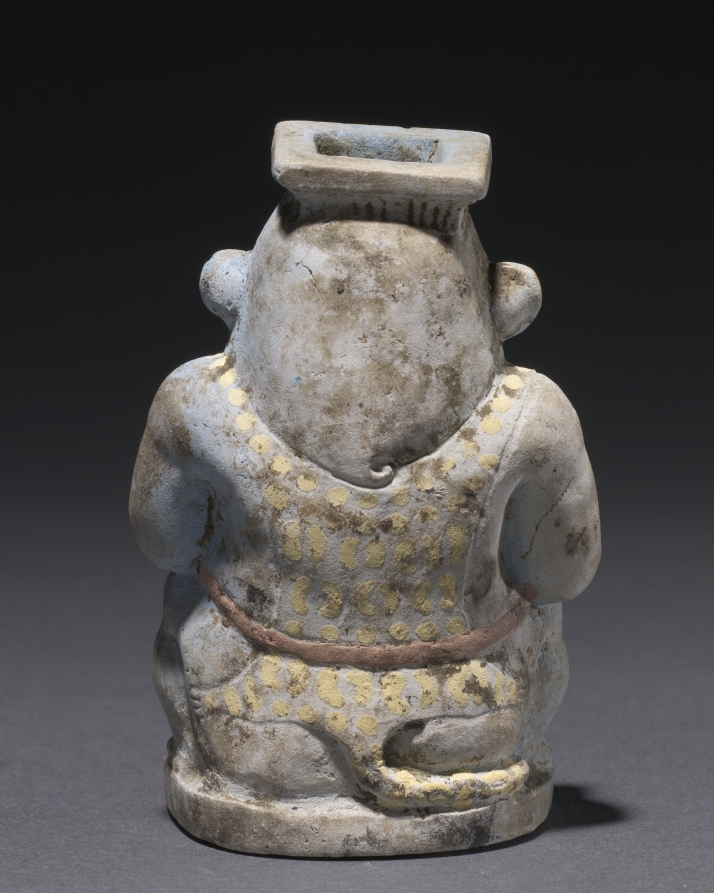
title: Cosmetic Jar in the Form of the God Bes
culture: Egypt, Late period (715–332 BCE), Dynasty 26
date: 664–525 BCE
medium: Egyptian blue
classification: Vessels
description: Both ancient Egyptian men and women loved cosmetics. Unguents, oils, and perfumes made from aromatic plant resins and gums were obtained at great cost from distant lands. The objects identified with cosmetics were given lavish treatment. The god Bes, patron god of cosmetics, is the subject of this colorful jar.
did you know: Bes was the Egyptian god of many things, including cosmetics, war, and childbirth.